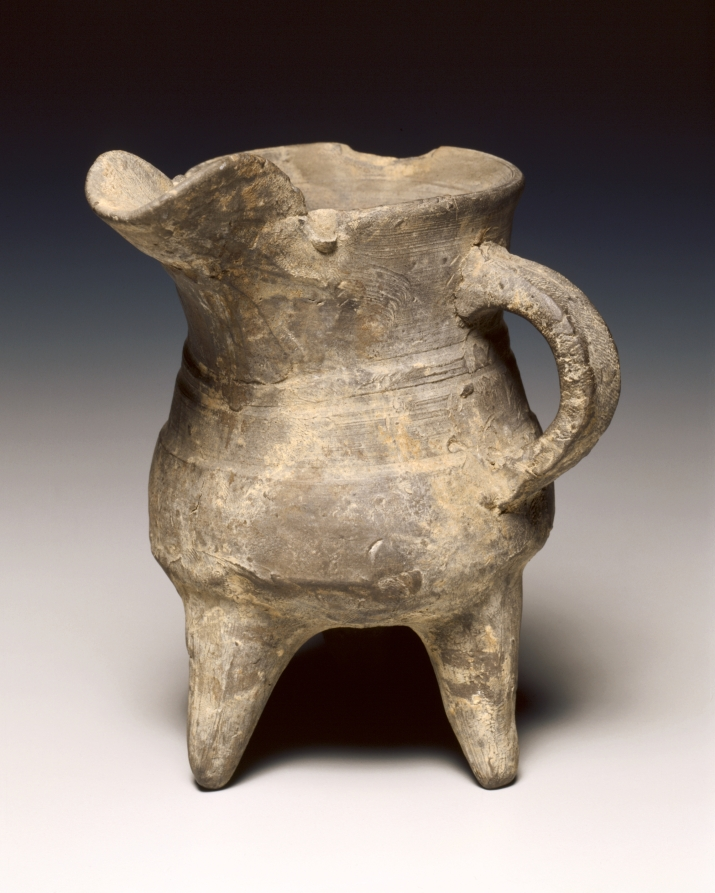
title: Wine Warmer (Jue)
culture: China, Shang dynasty (c. 1600–c. 1046 BCE), Anyang phase (c. 1250–1046 BCE)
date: c. 1300–1023 BCE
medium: pottery, tripod vessel with loop handle and rudimentary bowstring decoration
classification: Ceramic